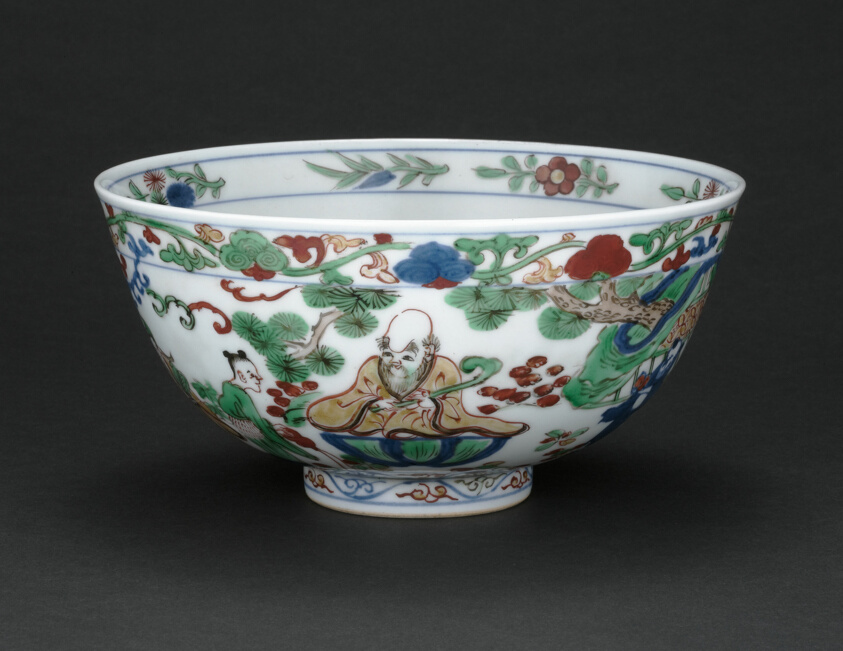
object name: Vessel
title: Bowl with God of Longevity (Shoulao) and Eight Daoist Immortals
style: Chinese (culture or style), ming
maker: China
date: Ming dynasty (1368–1644), Wanli reign mark and period (1572–1620)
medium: Porcelain painted in underglaze blue and overglaze polychrome enamels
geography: China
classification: bowl; dish (vessel); ceramics; asian art; porcelain; vessel